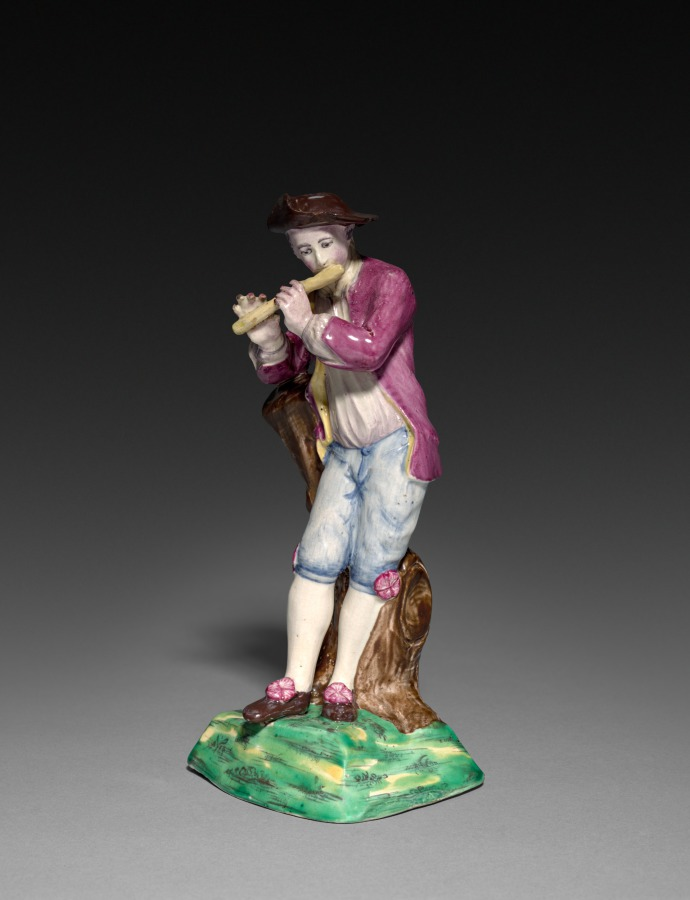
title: Boy Playing a Flute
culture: France, 18th century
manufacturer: Saint-Amand-les-Eaux (French)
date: 1760–1770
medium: faience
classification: Ceramic